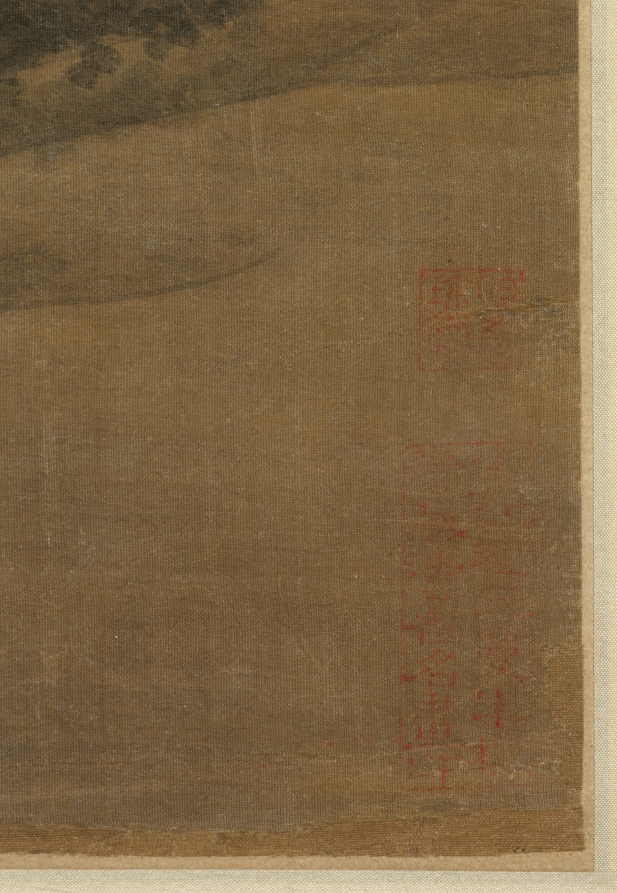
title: Landscape in the Style of Dong Yuan and Juran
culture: China, Qing dynasty (1644-1911)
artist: Gong Xian (Chinese, 1599–1689)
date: c. 1650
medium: hanging scroll, ink with white pigment on silk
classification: Painting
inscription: 畫家董巨，實開南宗。既無剛根之氣，復無刻畫之跡。後之作者或以才見，或以法稱。唯董巨則幾乎道矣。然逞才則離法，泥法則叛道。至道無可道。說者謂即歛才就法之謂道。問之董巨，而董巨不知，忽乎微矣。此幅余二十年前舊作。藏之新安吳氏。吳君晉明寶之若家珍。後携之金陵。命余題識。余因與晉明論畫及此，并紀之。非敢曰此效法董巨而有得焉者也。 庚戌冬杪半畝居人龔賢。 [印]龔半千; 野遺賢; [左下]龔賢; [上]可能另有龔賢一印。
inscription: 2 additional seals of Cheng Qi 程琦 (1911–1988)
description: Towering peaks and unfolding ranges are piled up and overlaid with layer after layer of brushwork to give an overall dense, dark, and even melancholic effect. Gong Xian created a personal style of landscape, which departed greatly from his models Dong Yuan and Juran. The tension between tradition and individuality had been a topic of interest for the Chinese artist. As Gong Xian writes in his inscription: "Painters of later periods may be known for their natural talents or praised for their observance of established traditions. . . . However, those who indulge in showing off their talent will deviate from the tradition, while those who adhere to tradition will alienate themselves from the Dao. The supreme Dao is inexplicable in words. . . ."